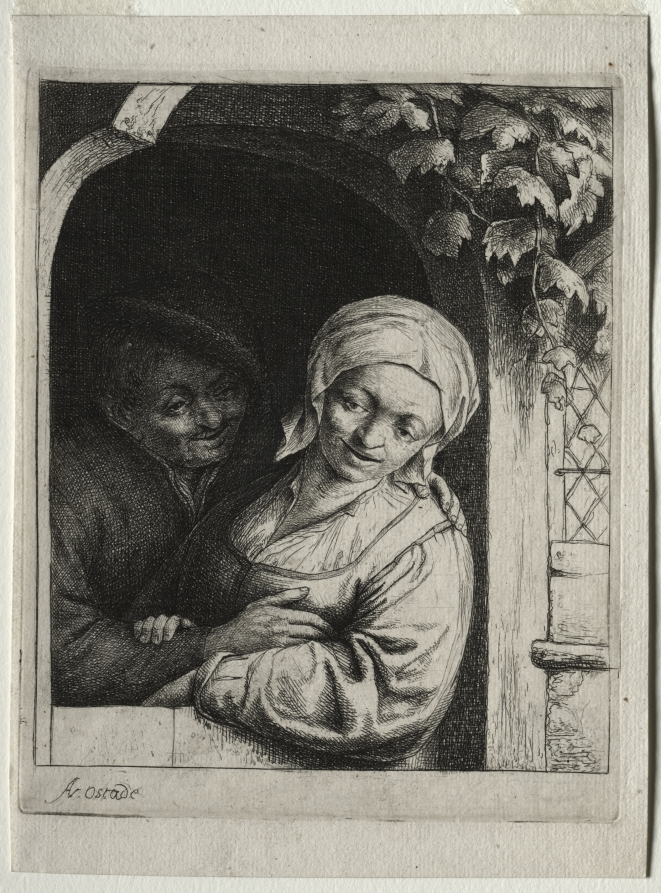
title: Rural Tenderness (Village Romance)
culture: Netherlands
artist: Adriaen van Ostade (Dutch, 1610–1684)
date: c. 1652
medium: etching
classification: Print